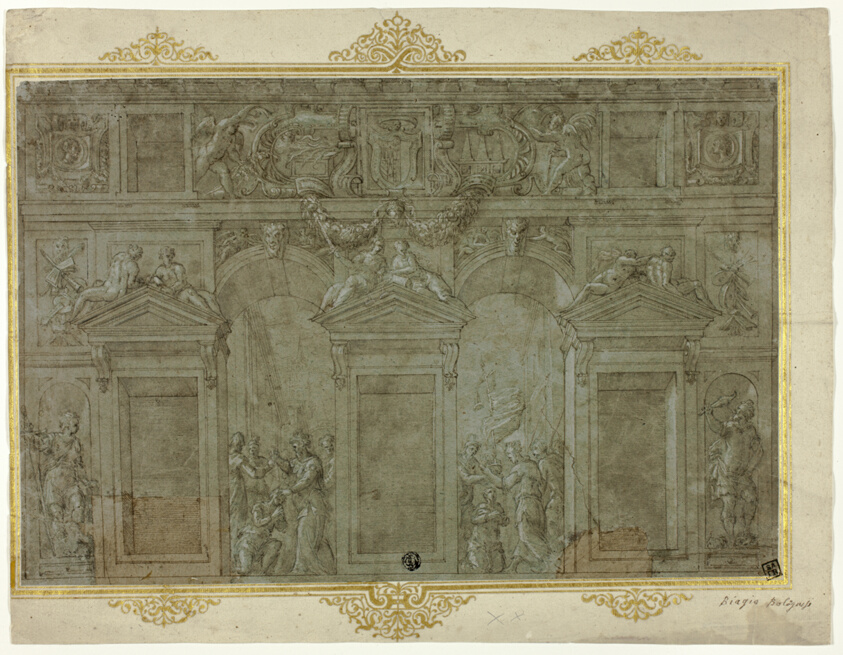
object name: Drawing and Watercolor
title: Design for a Façade Decoration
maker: Circle of Girolamo Genga (Italian, c. 1476-1551)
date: c. 1548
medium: Pen and brown ink, heightened with lead white, on blue laid paper, edge mounted to cream laid paper with ornamental border in brush and gold paint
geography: Italy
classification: pen and ink drawings; drawings (visual works); prints and drawing